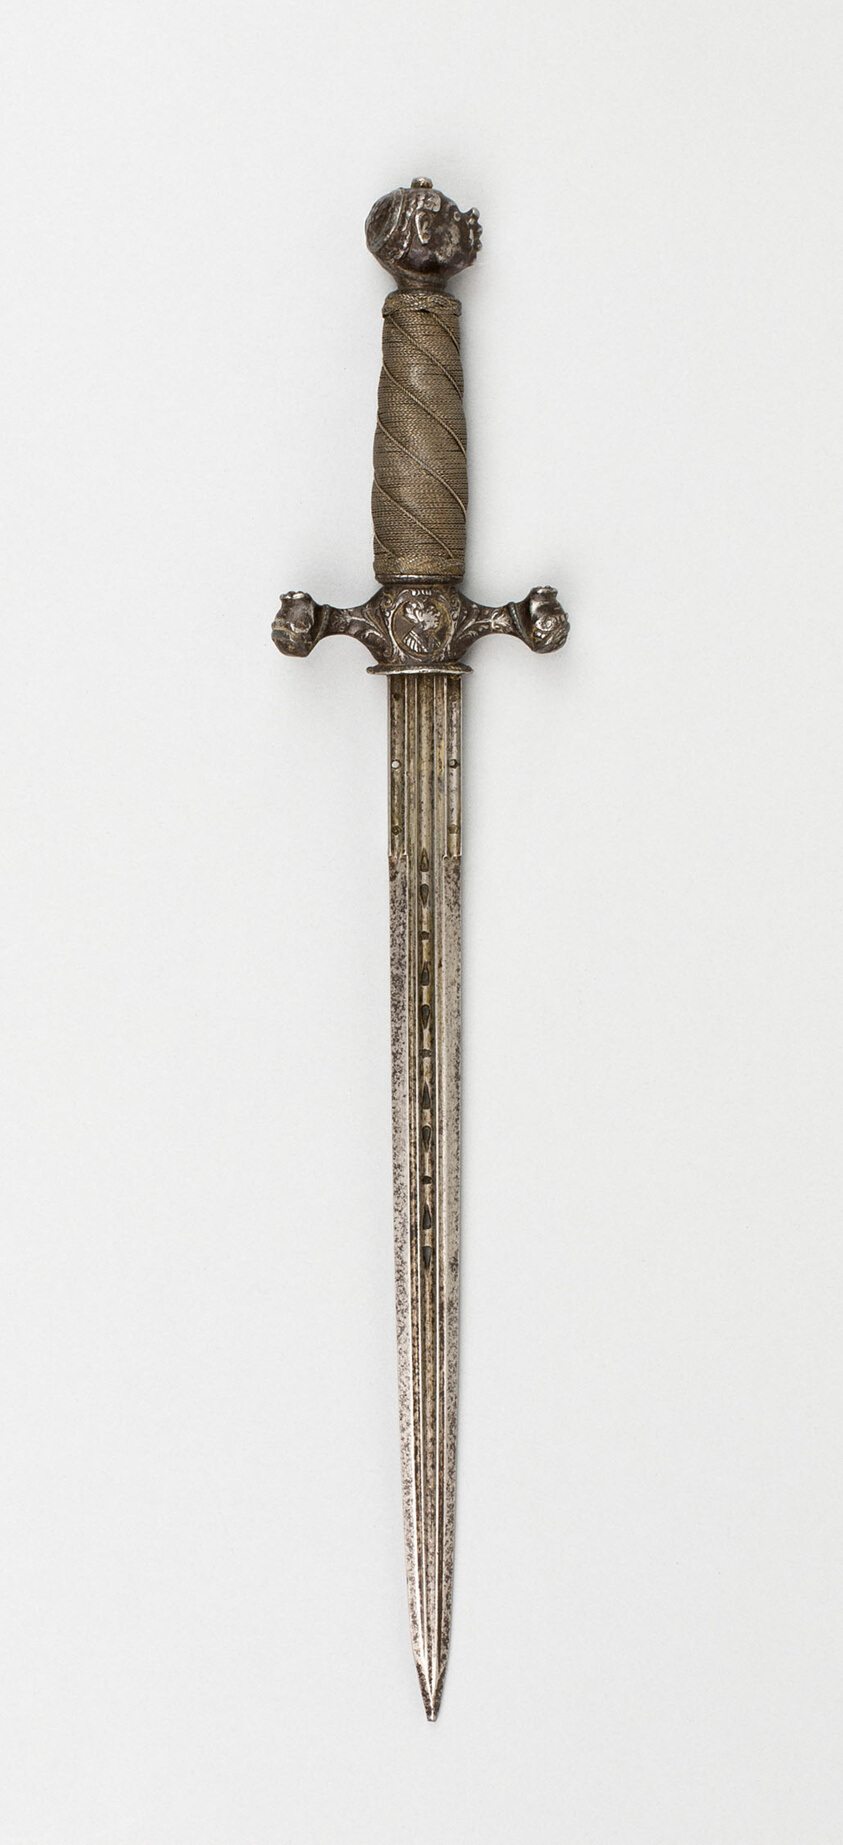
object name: Arms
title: Parrying Poniard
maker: German; Blade possibly Spanish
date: c. 1620/30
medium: Steel, wood, and brass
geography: Germany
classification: edged weapon-dagger; arms; arms and armor